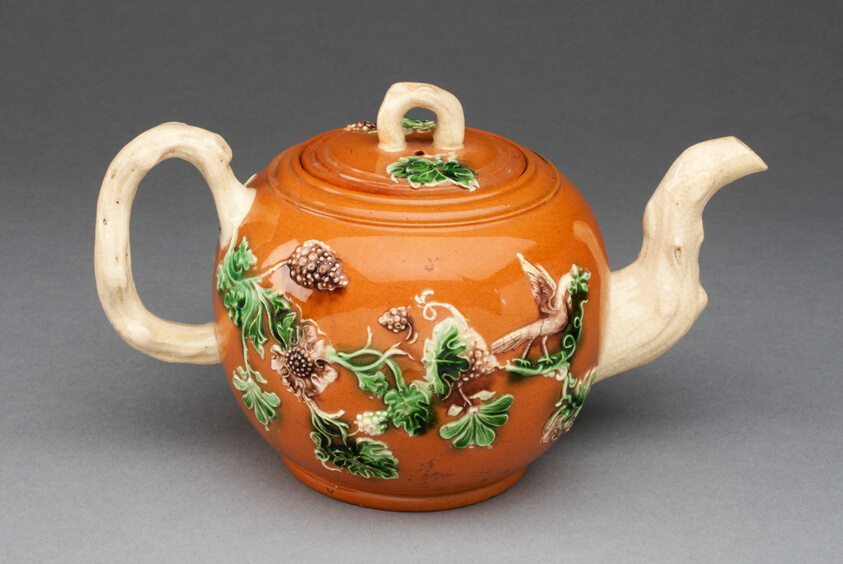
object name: Ceramics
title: Teapot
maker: Staffordshire, England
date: c. 1750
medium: Lead-glazed earthenware (creamware)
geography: Staffordshire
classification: teapot; creamware; lead-glazed earthenware; earthenware; european decorative arts; ceramics